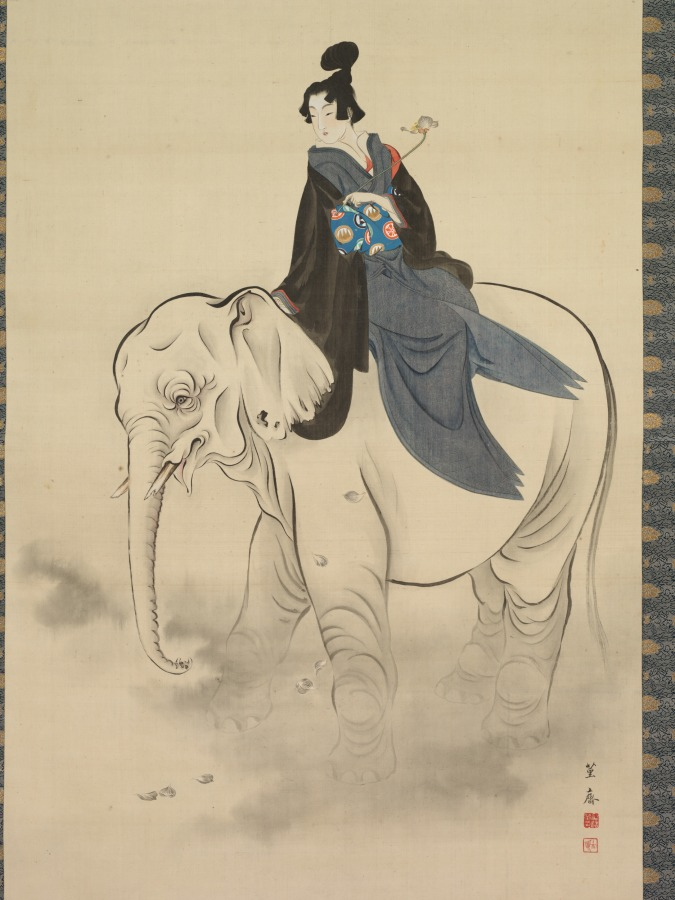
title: Stand-in Fugen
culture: Japan, Edo period (1615–1868)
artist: Kitao Masayoshi (Japanese, 1761–1824)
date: late 1700s–early 1800s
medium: hanging scroll; ink and color on silk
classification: Painting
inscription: artist's signature and two seals, lower right.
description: Here, a woman dressed as a man replaces Fugen, a bodhisattva—a being among those considered enlightened in Buddhism—who symbolizes learning as a path to awakening and typically rides an elephant. The painting teaches the lesson of impermanence through the petals falling from the lotus flower the woman holds. It also alludes to the legend of Eguchi, a 12th-century courtesan who, following an encounter with a Buddhist monk-poet called Saigyō, revealed herself to be a manifestation of Fugen.